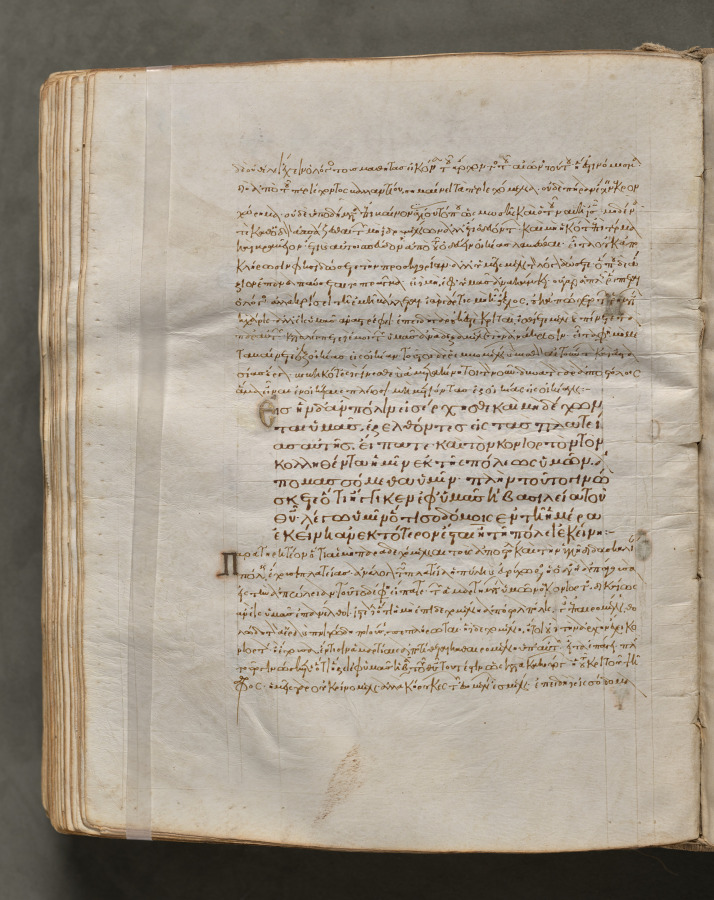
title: Text, folio 253 (verso), from a Gospel Book with Commentaries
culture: Byzantium, Constantinople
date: c. 1000–1100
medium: ink, tempera, and gold on vellum; leather binding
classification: Bound Volume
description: Each of the four gospels in this book opens on a page with brilliantly illuminated borders depicting the author of the text as well as birds—principally peacocks, symbols of the immortality of the soul—and fountains, representing the fountain of life and the salvation of the soul. This volume consists of 428 leaves with texts in Greek. Its level of sophistication suggests that it was probably written and decorated in a monastery in Constantinople.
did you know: Gospel books were carried in procession through Byzantine churches.